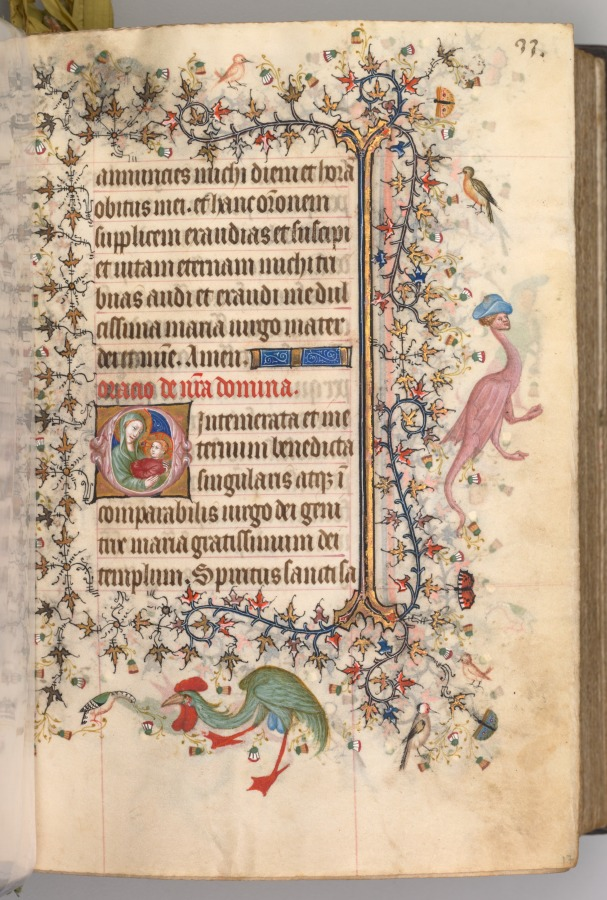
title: Hours of Charles the Noble, King of Navarre (1361-1425): fol. 17a, Text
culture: France, Paris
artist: Master of the Brussels Initials and Associates (French)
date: c. 1405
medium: ink, tempera, and gold on vellum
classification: Bound Volume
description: This precious volume was obviously highly prized by its owner, the French-born King of Navarre, who had his coat of arms painted on no less than twenty folios. Rather than directly commissioning this manuscript from a specific workshop, it seems that Charles the Noble acquired his book of hours -- perhaps ready-made for the luxury market -- while on a trip to Paris in 1404-05. A collaborative effort, six painting styles are evidenced within the pages of this codex, those of two Italians, two Frenchmen, and two Netherlanders. The painter who was responsible for the planning and decoration of the book, and who produced seventeen of the large miniatures, was a Bolognese artist known as the Master of the Brussels Initials. His principal assistant, responsible for most of the borders, was a Florentine who signed his name "Zecho" da Firenze on folio 208 verso.